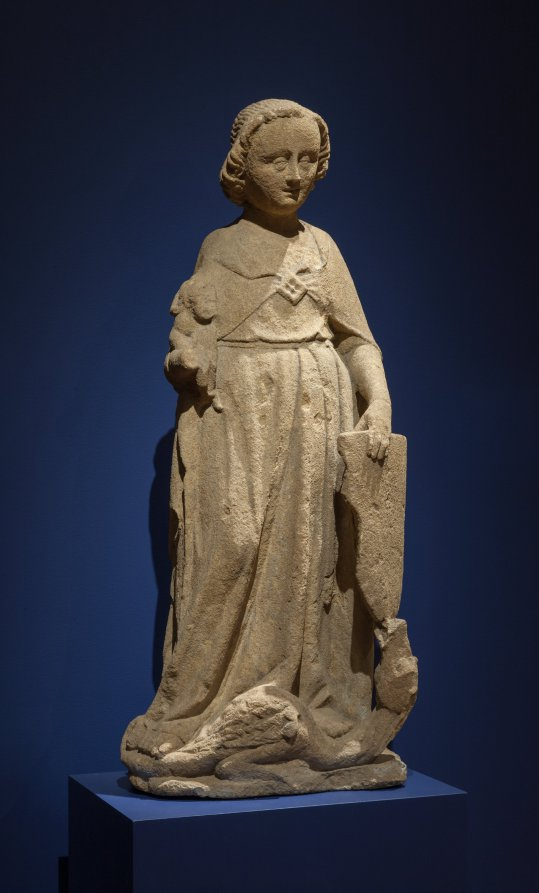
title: Saint Michael the Archangel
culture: Eastern France, Lorraine, 13th century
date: c. 1280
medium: fossiliferous limestone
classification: Sculpture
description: The Archangel Michael is shown here in his traditional role as the protector of souls who escorts the good into heaven. Though damaged, he holds the remnants of a small figure representing a human soul within his right arm. At his feet, the vanquished dragon symbolizes the saint’s defeat of evil in his struggle with the devil. This sculpture is believed to come from the cloister of the former Benedictine monastery of St.-Mihiel (dedicated to Saint Michael) in eastern France, near Verdun. Much of this abbey was destroyed during the French Revolution.